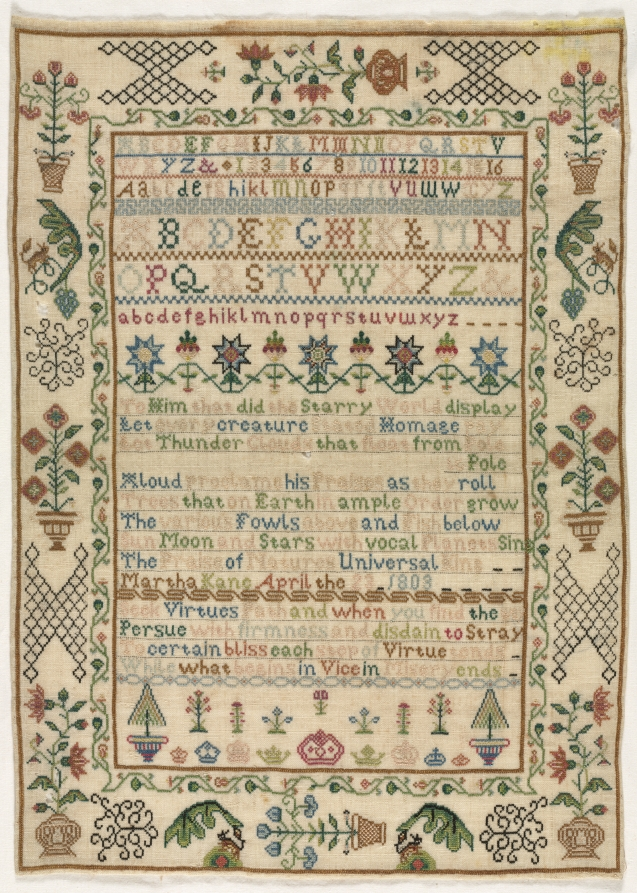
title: Sampler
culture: England, early 19th century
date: 1803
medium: embroidery; silk on woolen canvas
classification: Sampler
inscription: rows of alphabet and numerals, verses, and inscription: "Martha Kane April the 23, 1803.